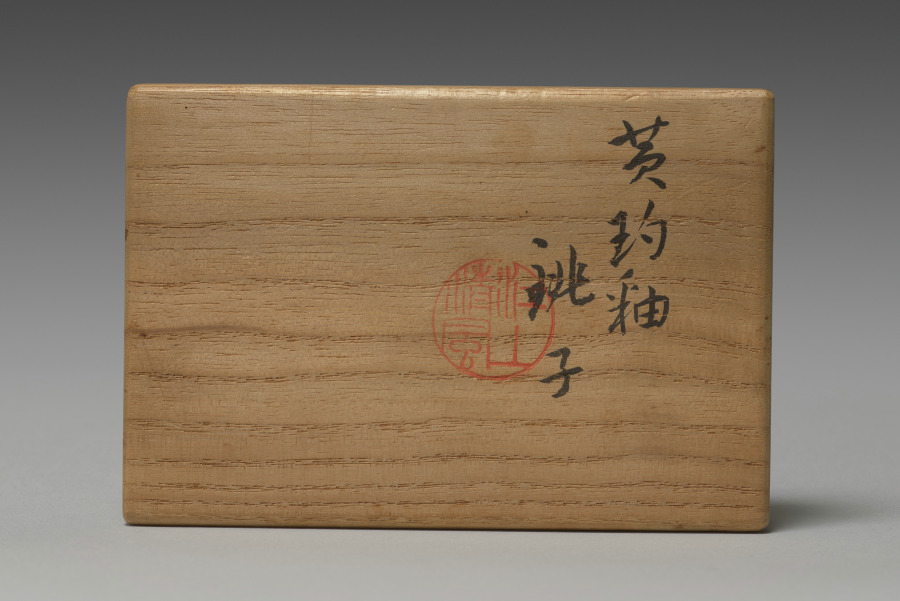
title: Sake Pourers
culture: Japan, Taishō period (1912–26) or Shōwa period (1926–89)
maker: Seifū Yohei IV (Japanese, 1872–1951)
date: 1914–46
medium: Pair of sake pourers; porcelain with yellow glaze and bamboo handles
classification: Ceramic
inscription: 清風造 。 【印】 清風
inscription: 成山清風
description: Like his father, Yohei IV also produced works with red or yellow monochrome glazes. His yellow-glazed works include this pair of sake pourers, a set of five drinking cups CMA 2022.217, and a sweets bowl molded into the shape of a chrysanthemum CMA 2022.218.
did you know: The lid's handle is made of bamboo.